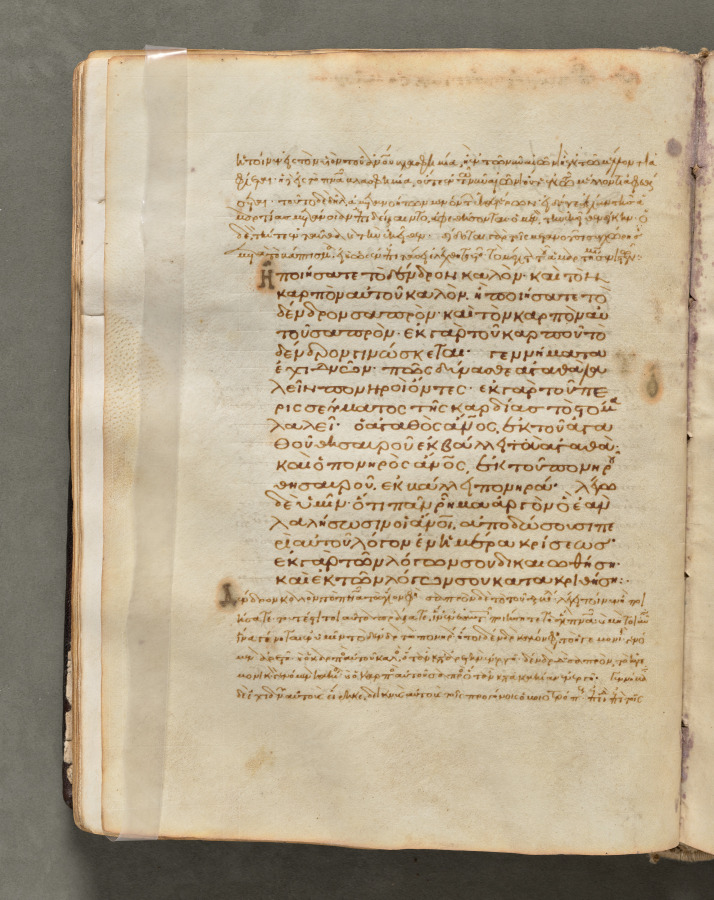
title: Text, folio 54 (verso), from a Gospel Book with Commentaries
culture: Byzantium, Constantinople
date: c. 1000–1100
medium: ink, tempera, and gold on vellum; leather binding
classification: Bound Volume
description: Each of the four gospels in this book opens on a page with brilliantly illuminated borders depicting the author of the text as well as birds-principally peacocks, symbols of the immortality of the soul-and fountains, representing the fountain of life and the salvation of the soul. This volume consists of 428 leaves with texts in Greek. Its level of sophistication suggests that it was probably written and decorated in a monastery in Constantinople.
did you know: Gospel Books were carried in procession through Byzantine churches.